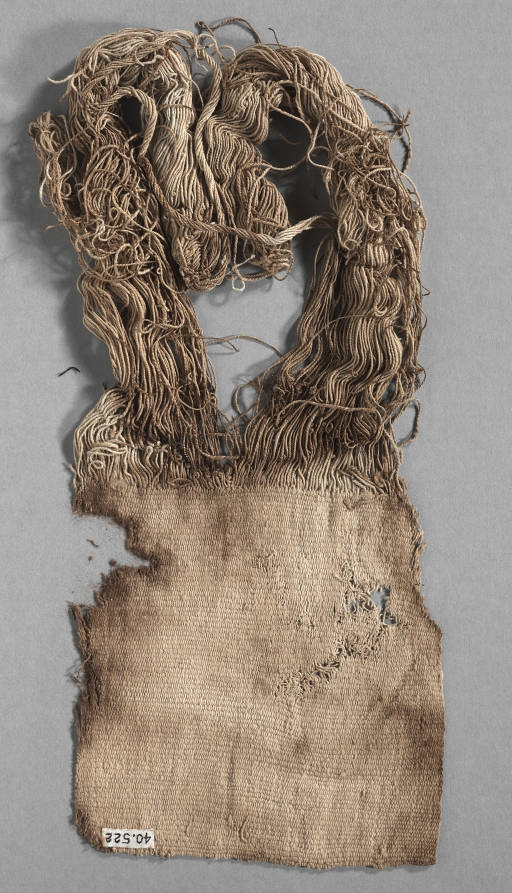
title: Mummy Bundle "Mask"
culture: Peru, South Coast, Ica Valley, Ocucaje site, Paracas style (700 BCE–1 CE)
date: 170 BCE–70 CE (radiocarbon date, 95% probability)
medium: plain warp-faced cloth, painted: cotton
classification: Textile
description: The Paracas people of Peru's South Coast buried their dead in pear-shaped mummy bundles made of a seated human body carefully wrapped in garments and other textiles. Sometimes a painted cloth was placed at the top of the bundle, as though it served as the bundle's face, head, or "mask." The cloth was padded on the back so it curved outward like a face, and the tress-like yarns (unwoven warps) at the upper edge were arranged around a solid cotton disk that, in turn, was wrapped with a headband. Some cloths were painted with mask-like faces, and others with full figures, apparently mythical creatures.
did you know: These masks fall into two categories, those with only a face and those with a full-bodied figure.